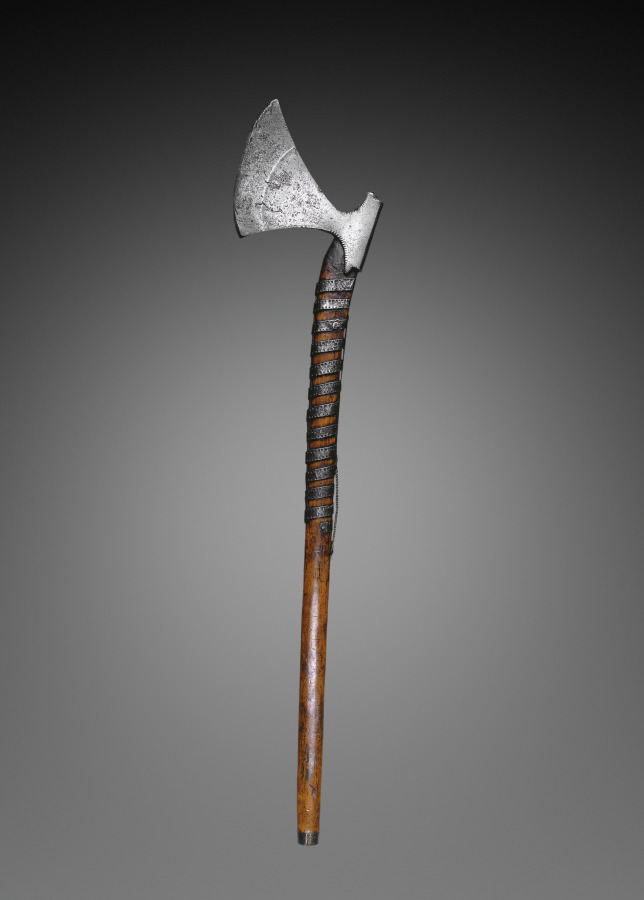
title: Battle Axe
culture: Scandinavia (?), 15th century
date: 1400s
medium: Steel and wood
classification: Arms and Armor